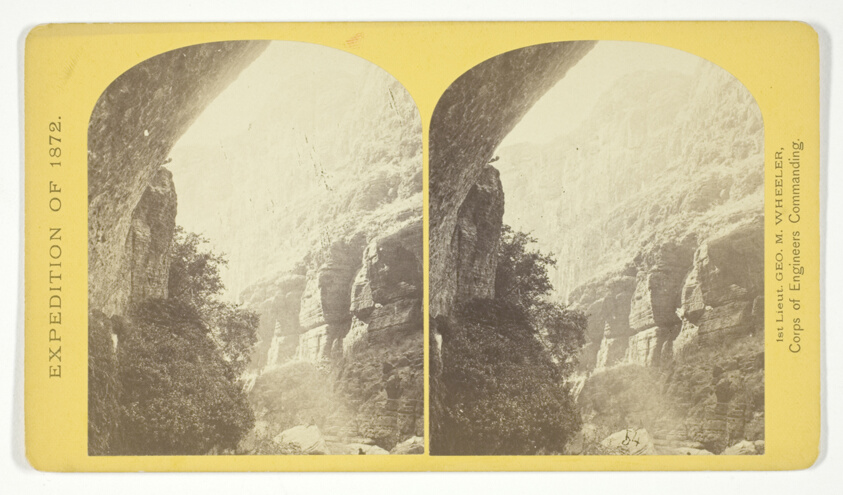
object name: Photograph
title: The Cañon of Kanab Creek, near its junction with the Grand Cañon of the Colorado. In the foreground is a dripping spring affording a shower bath. Temperature, 69° Fahr, No. 8 from the series "Geographical Explorations and Surveys West of the 100th Meridian"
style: 19th century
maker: William H. Bell (American, 1830-1910); commissioned by George Wheeler for the War Department, Corps of Engineers, U.S. Army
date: 1872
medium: Albumen print, stereo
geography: United States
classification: stereograph (albumen); photography; photograph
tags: Collected by Hugh Edwards, Geographical Explorations and Surveys